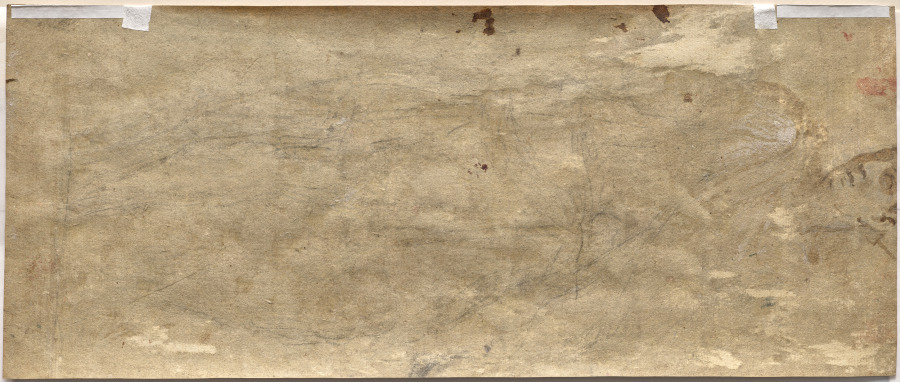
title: The Apostles Gathered Around the Tomb of the Virgin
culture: Italy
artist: Camillo Procaccini (Italian, 1546–1629)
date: c. 1594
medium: Pen and ink and brush and wash with white heightening on paper prepared with reddish-brown wash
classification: Drawing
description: Camillo Procaccini was a significant figure in the artistic activity of Bologna and Milan at the beginning of the Catholic Counter Reformation. This drawing is a preparatory work related to large oil painting still in situ (in its originally intended location), in the apse of the Santa Maria Maggiore in Bergamo, Italy. Part of a program depicting the assumption of the Virgin, the drawing shows the apostles at the empty tomb of the Virgin, exclaiming with emotion at the miracle of her ascension to heaven. Procaccini’s iconographic program aligned with current reforms in Catholic imagery that placed emphasis on articles of faith and lives of the saints, often through miracles.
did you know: The warm, reddish color of this paper was created with a colored ink wash in order to create a middle tone upon which the artist could draw with lighter and darker tones, creating a study of dark and light, or chiaroscuro.